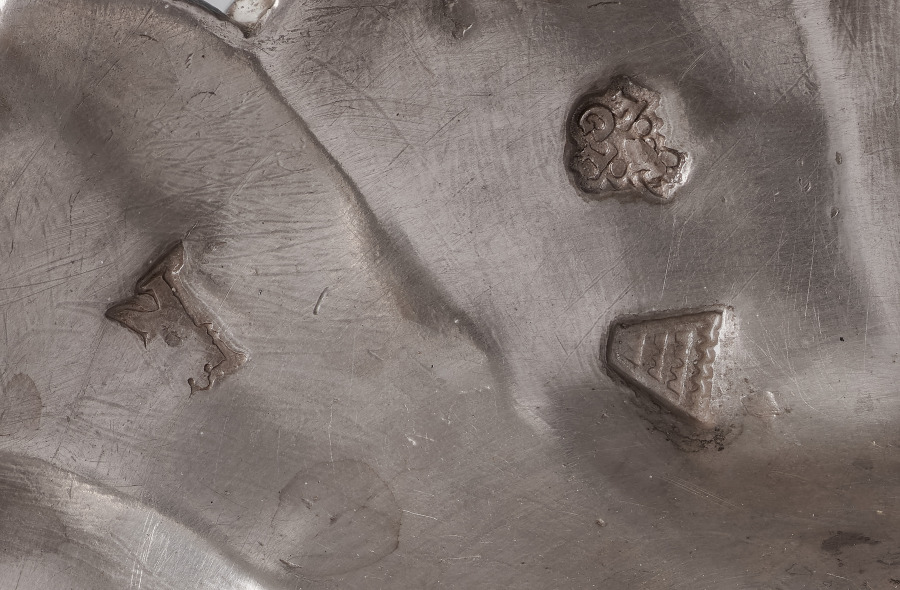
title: Candelabrum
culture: France, Paris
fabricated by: François Thomas Germain (French, 1726–1791)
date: 1757–58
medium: silver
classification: Silver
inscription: [Charge mark of Eloy Brichard , 1756−1762, beneath base]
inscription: [Warden's mark for Paris, 1757-1758, beneath base]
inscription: [Discharge mark for work intended for export, 1756−1775, on base]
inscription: [Hallmarks for Saint Petersburg, on base]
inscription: [Assayer mark of Ivan Frolov, on base]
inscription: [Russian standard of the French silver, on base]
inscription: [Maker’s mark of Francois-Thomas Germain, master silversmith on October 16, 1748, beneath drip pan one each of three bobeches]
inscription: [Charge mark Of Eloy Brichard, 1756−1762, beneath drip pan one each of three bobeches]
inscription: [Discharge mark for work intended for export, 1733 (?)−1775, beneath drip pan one each of three bobeches]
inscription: [Warden's mark for Paris, 1757−1758, beneath drip pan one each of three bobeches]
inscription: [Assayer mark of Ivan Frolov, beneath drip pan of one of three bobeches]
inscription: [Russian standard of French silver, beneath drip pan of one of three bobeches]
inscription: [Charge mark for large work of Eloy Brichard, 1756−1762, on candelabra bayonet attachment]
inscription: [Discharge mark for work intended for export, on candelabra bayonet attachment]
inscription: [Beneath base]: “Fait. Par. F. T. Germain. Sculp[teu]r. Orf[ev]re. Du Roy. Aux. Galleries. Du Louvre. A Paris. 1758”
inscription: [Beneath base]: "Du no.32"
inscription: [Beneath base]: "No 465"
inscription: [Engraved Russian Imperial coat-of-arms, beneath base]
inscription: [Modern inscription in a round paper label, beneath base]: “[?]8” [printed in black]: “3120” [written in pencil]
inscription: [Modern inscription in a rectangular paper label, beneath base]: “…IN/FRANCE” [printed in black]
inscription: [Modern inscription in a rectangular paper label, beneath base]: “46” [written in black ink]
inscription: [Engraved cipher composed with two “M”’s (?) surmounted by a royal crown, on base]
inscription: [Engraved, on base]: "No 465"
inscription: [Engraved, on base]: "du No 32"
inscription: [Engraved cipher composed with two “M”’s (?) surmounted by a royal crown, on one bobeche]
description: This candelabrum is part of a pair. Its design blurs the line between function and decoration. The arms twist and curve, appearing as flower stems while physically supporting the candles. Though this visual unity is typical of the Rococo style, the influence of the rising neoclassical style is evident in the allegorical scenes of light that decorate each candelabra’s stem.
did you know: These candelabra are part of a dinner service sent from Paris, France, to Saint Petersburg, Russia, in two separate shipments, the first of which contained 270 objects for 8 dozen place settings.